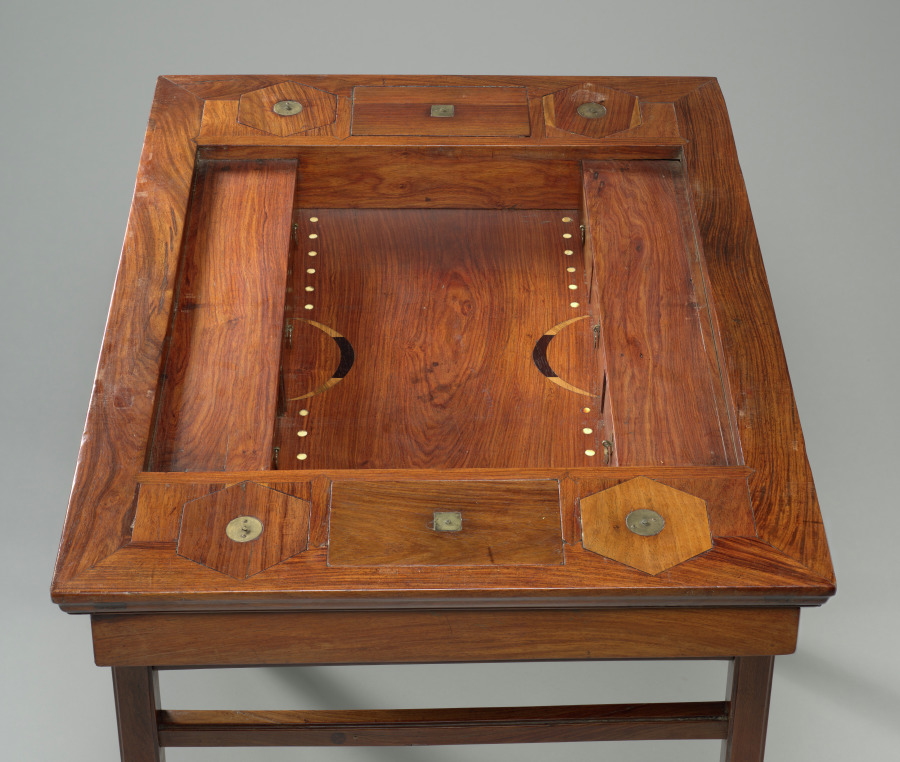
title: Game Table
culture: China, Ming dynasty (1368-1644) - Qing dynasty (1644-1911)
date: 1600s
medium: Rosewood (huanghuali)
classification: Furniture and woodwork